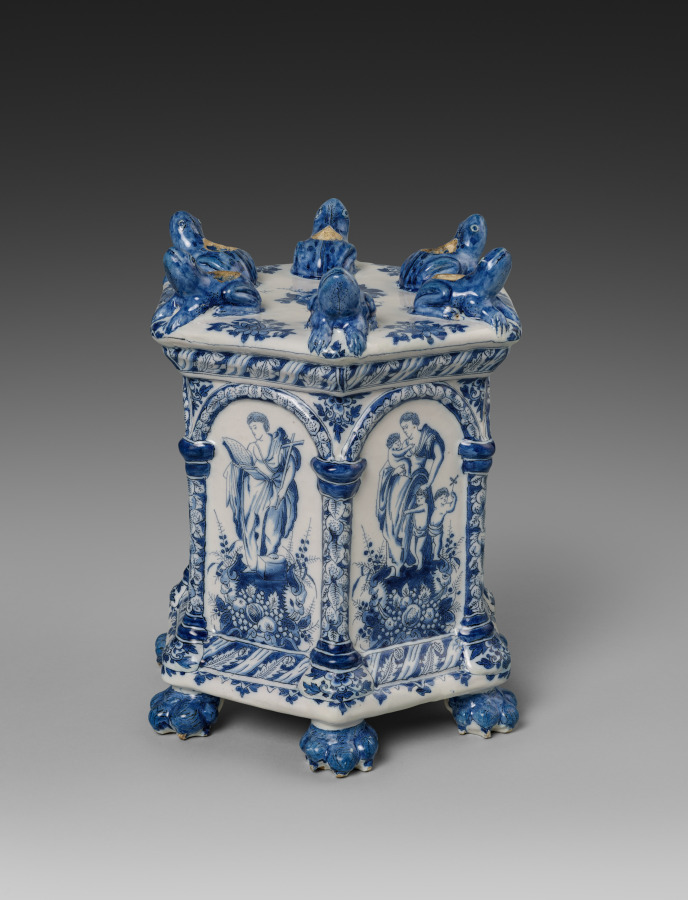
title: Base for a Flower Pyramid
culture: Netherlands, Holland, Delft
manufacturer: Adrianus Kocx (Dutch, active 1686–1701)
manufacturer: De Grieksche A (The Greek A) Factory (Netherlands, 1658–1811)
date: c. 1690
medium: Tin-glazed earthenware, painted in blue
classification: Ceramic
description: Allegorical figures representing Faith, Hope, and Love decorate the base of this pyramid, on which rest six tiers with spouts where flowers can be placed. Flower pyramids are among the most complex and luxurious types of ceramics produced in Delft in the late 1600s. This example was made in the Greek A Factory, owned by Adrianus Kocx. During his tenure, the factory became the most prestigious of Delft potteries and received commissions from Queen Mary II, who ruled over England, Scotland, and Ireland together with her husband, William III. She contributed to the international spread of the fashion for Delft ceramics.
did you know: The iconic blue-and-white ceramics from Delft originated as an attempt to copy Chinese porcelain.